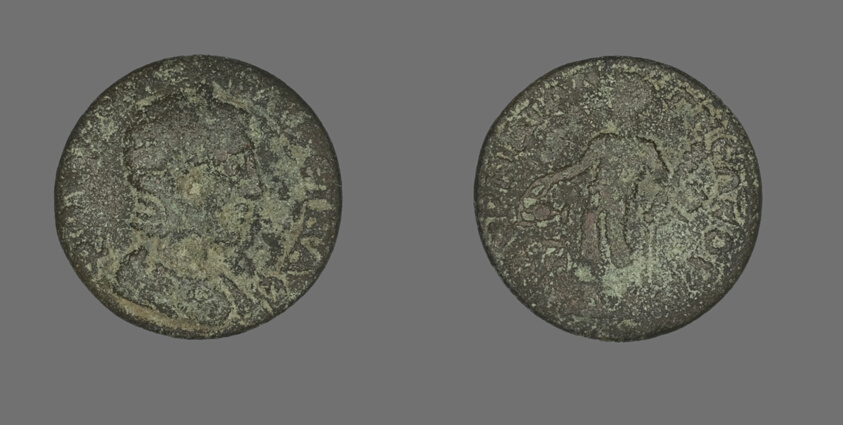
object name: Coin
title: Coin Portraying the Empress Tranquillina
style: roman (ancient, style or period)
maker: Roman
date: 193-217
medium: Bronze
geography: Roman Empire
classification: coin; ancient art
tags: portrait